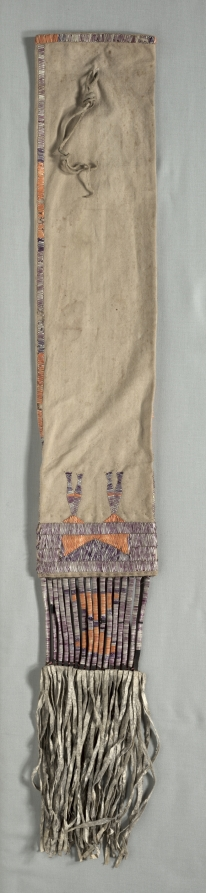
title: Pipe Bag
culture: Plains, Lakota (Sioux), 19th century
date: c. 1870–1890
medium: canvas and quill work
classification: Textile